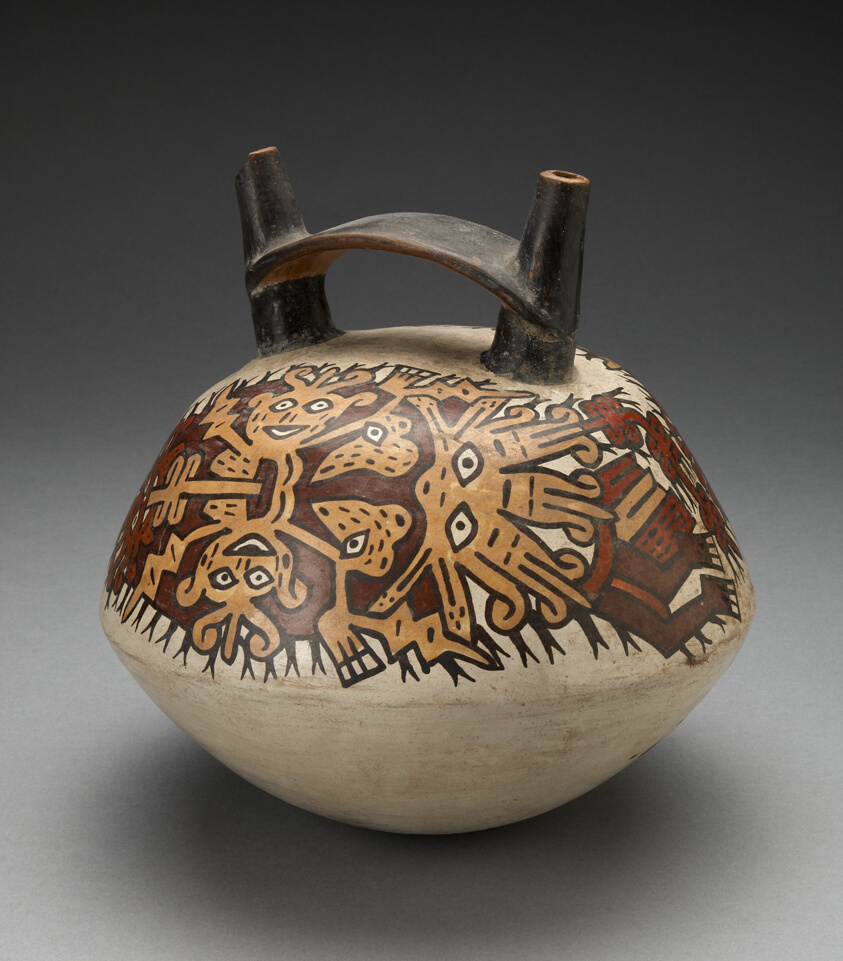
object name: Vessel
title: Double Spout Vessel Depicting Costumed Figure with Intricate Abstract Mask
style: nazca, early intermediate period, Pre-Columbian, americas, Arts of the Americas, andean, andes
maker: Nazca; South coast, Peru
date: 180 BCE–500 CE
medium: Ceramic and pigment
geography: Nazca Valley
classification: earthenware; art of the americas; ceramics; vessel